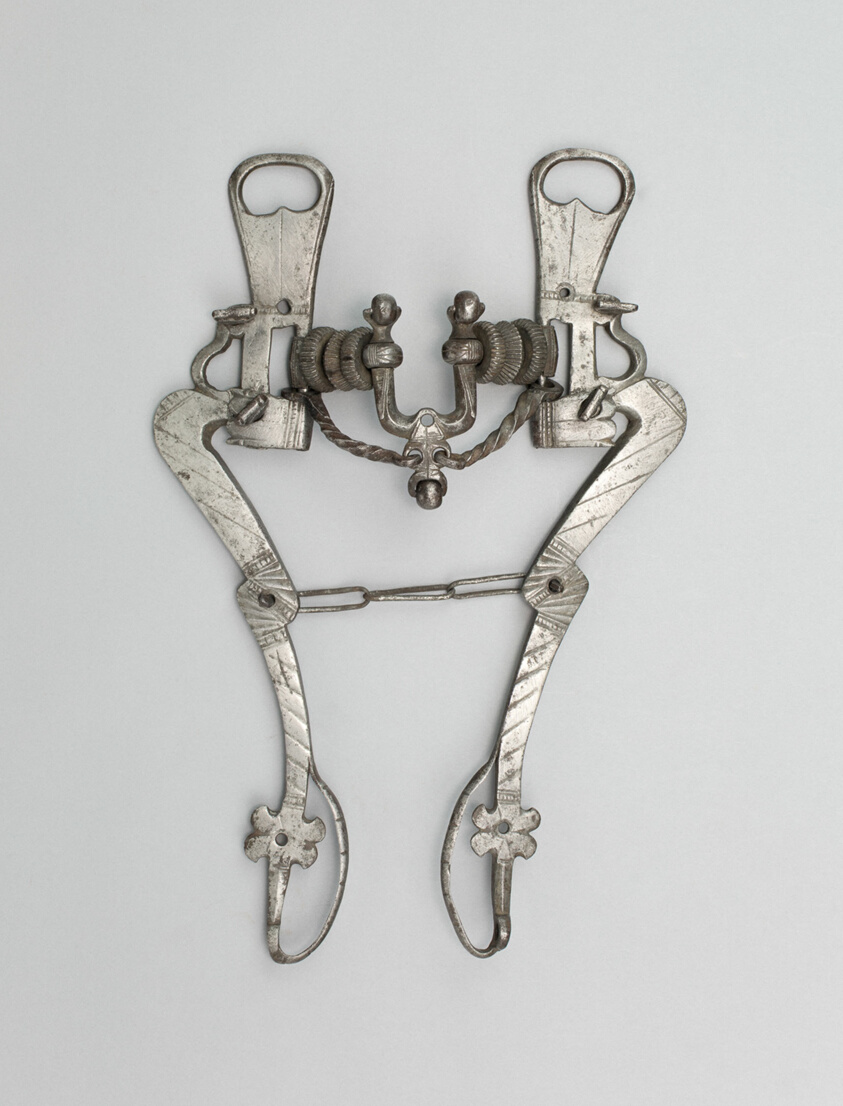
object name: Armor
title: Curb Bit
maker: European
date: early 16th century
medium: Iron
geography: Europe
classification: horse equipment; armor; arms and armor